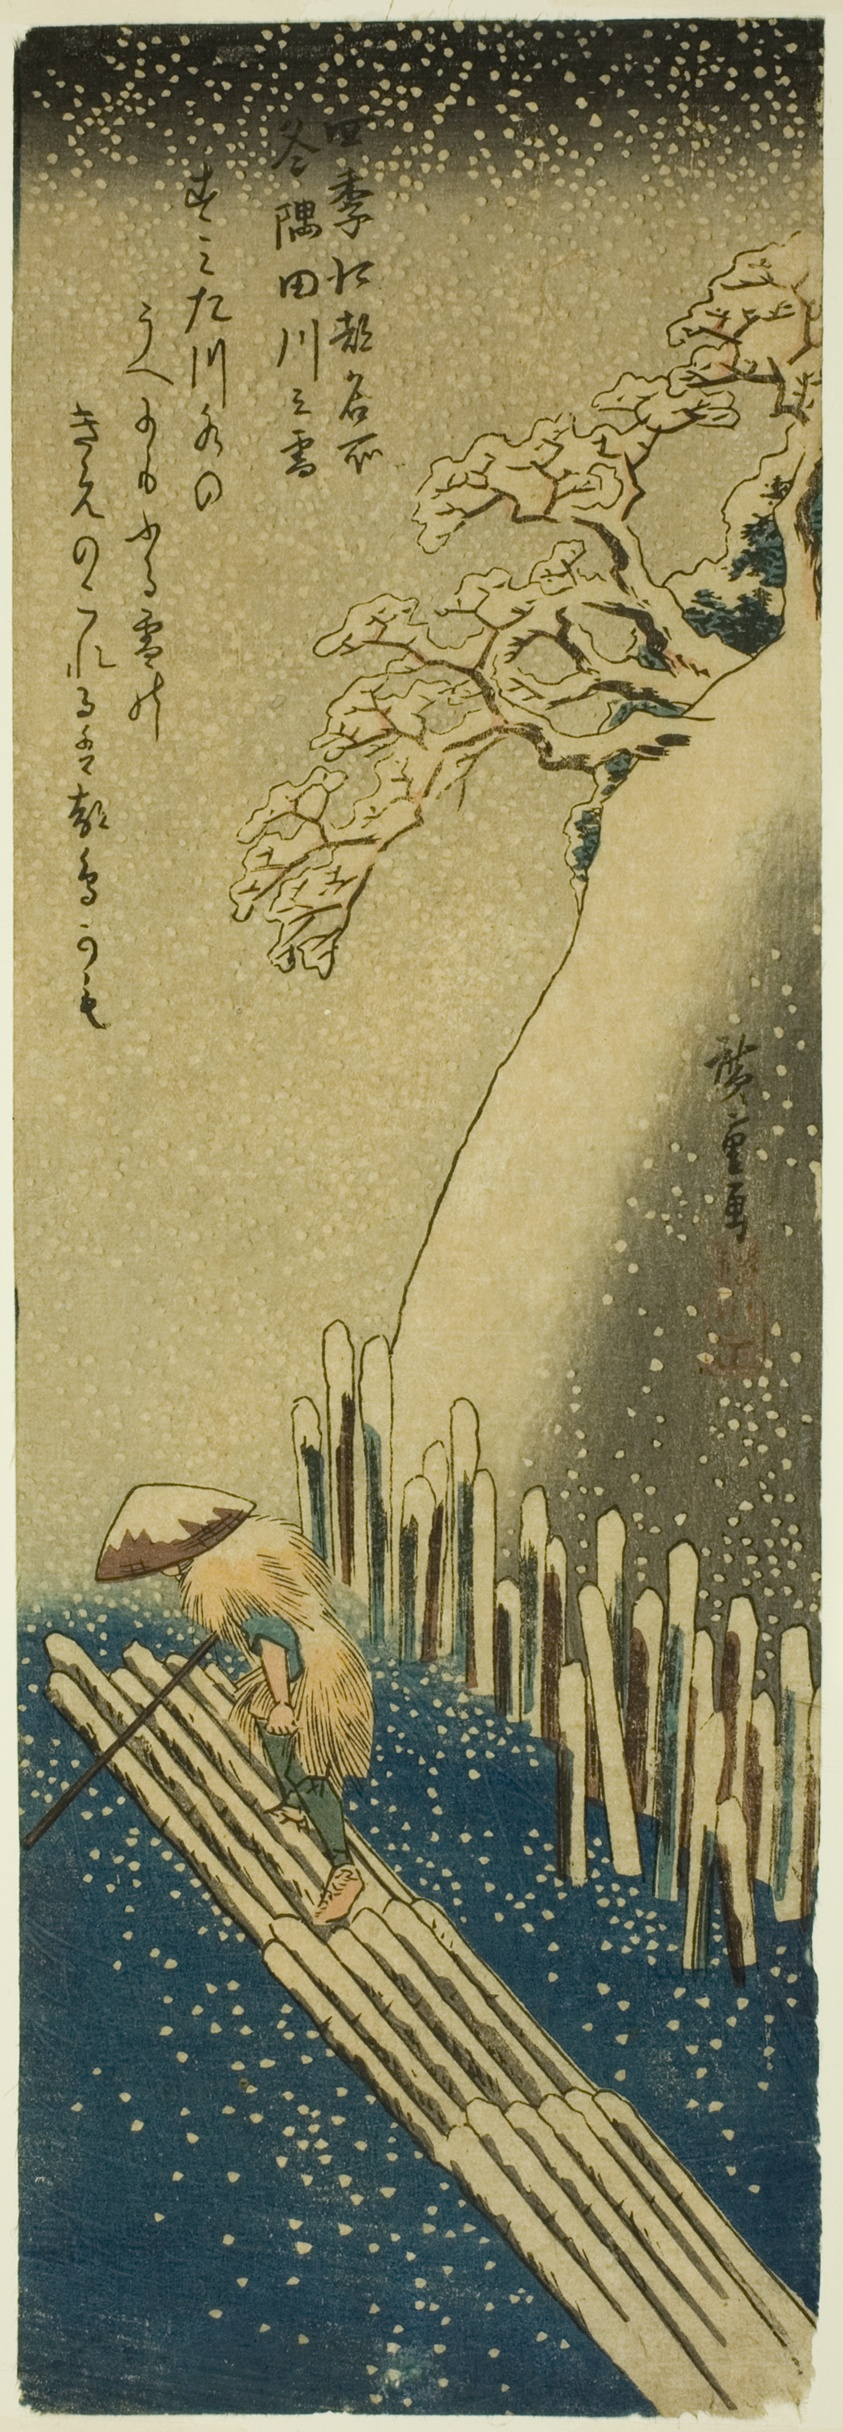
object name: Print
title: The Sumida River in Winter Snow (Fuyu Sumidagawa no yuki), from the series "Famous Places in Edo in the Four Seasons (Shiki Koto meisho)"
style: Japanese (culture or style)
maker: Utagawa Hiroshige 歌川 広重; Japanese, 1797-1858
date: 1834/35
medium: Color woodblock print; chu-tanzaku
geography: Japan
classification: woodblock print; print; asian art